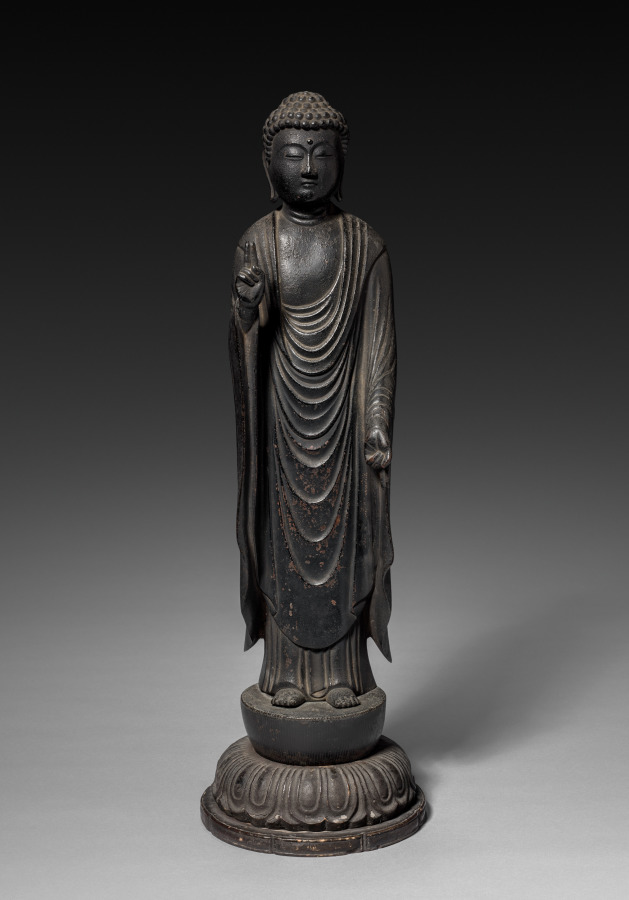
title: Amida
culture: Japan, Kamakura period (1185–1333) to Nanbokuchō period (1336–92)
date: 1300s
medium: patinated bronze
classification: Sculpture